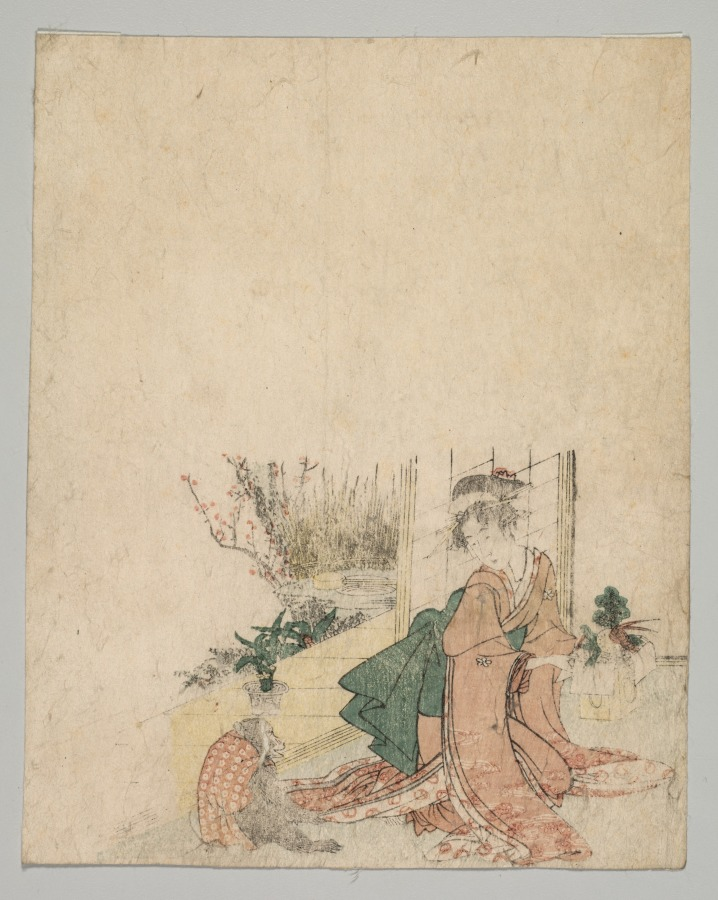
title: New Year's Scene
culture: Japan, Edo period (1615–1868)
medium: color woodblock print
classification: Print